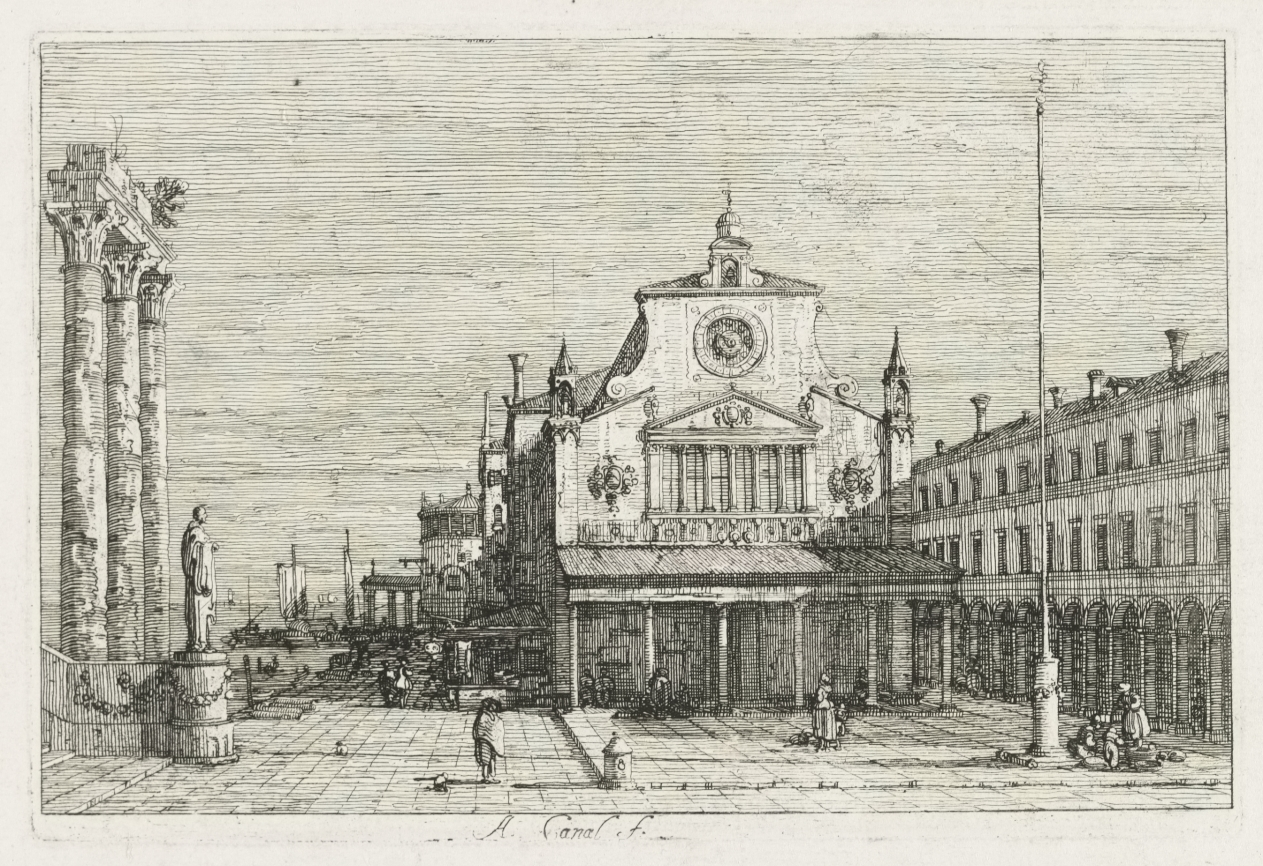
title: Views: Three Columns and a Statue on the Sea Coast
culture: Italy, Venice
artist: Antonio Canaletto (Italian, 1697–1768)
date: 1735–1746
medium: etching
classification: Print